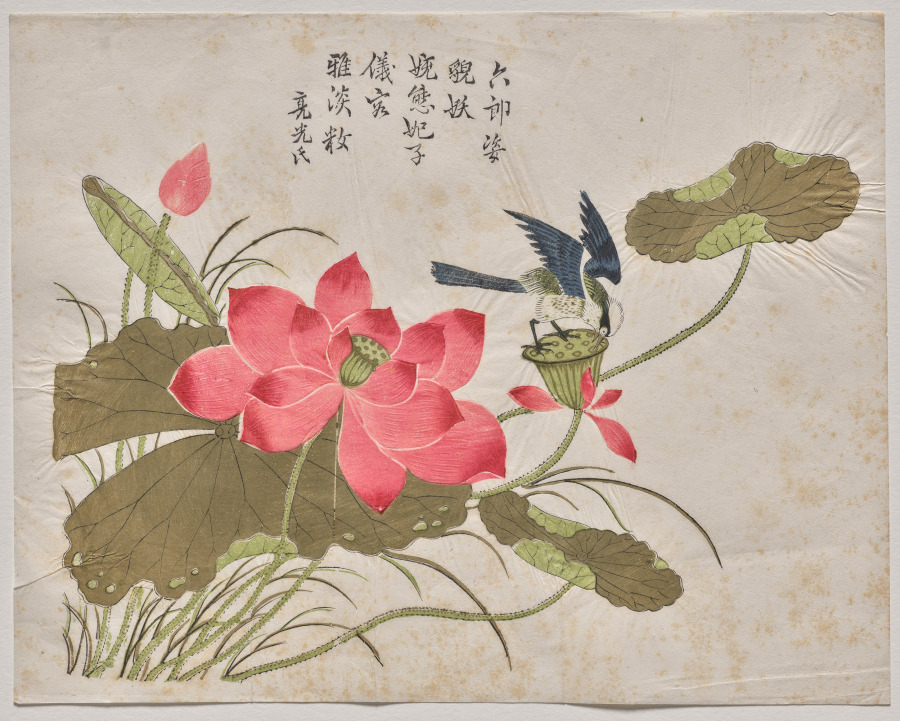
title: Bird on Lotus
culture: China, Suzhou, Qing dynasty (1644–1911)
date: 1700–1750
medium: Polychrome woodblock print; ink and color on paper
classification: Print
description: In the 1600s, printing flourished in such Jiangnan cities as Nanjing, Suzhou, Hangzhou, and Huizhou, evolving from privately enjoyed illustrated books printed in color to more commercialized single-sheet color prints that were hung on walls and became part of the rich urban visual culture.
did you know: Woodblock printing in color reached a height in China in the 1600s to 1700s. The prints were executed by means of sets of separate blocks, each carved to print a different color.